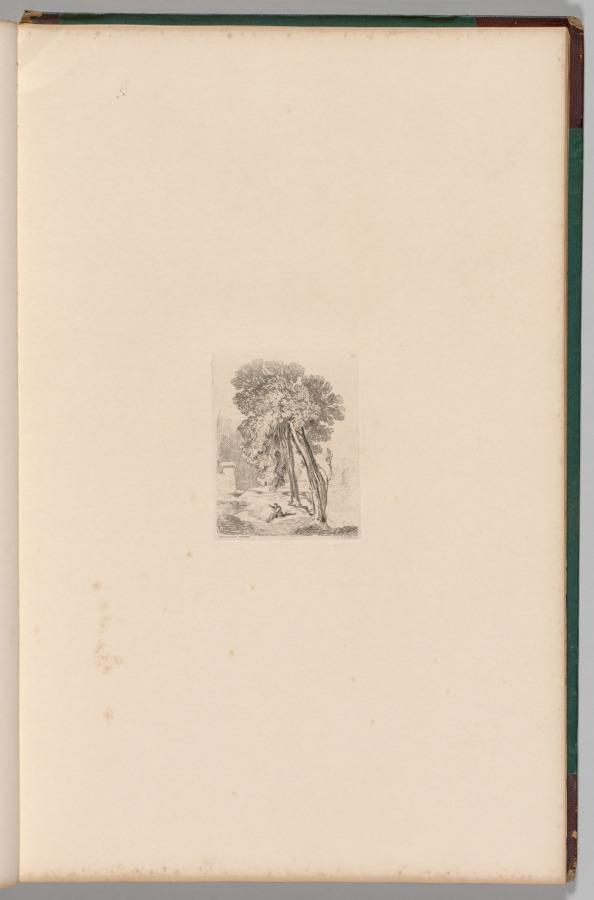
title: Liber Studiorum: Plate 18, Trees at Norwich Thorp, Norfolk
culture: England, 19th century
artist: John Sell Cotman (British, 1782–1842)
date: 1838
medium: softground etching, from a bound volume containing 48 plates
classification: Bound Volume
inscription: In plate, within image, upper right: 18; in plate, lower left, below image: NORWICH THORP; in plate, lower right, below image: J. S Cotman